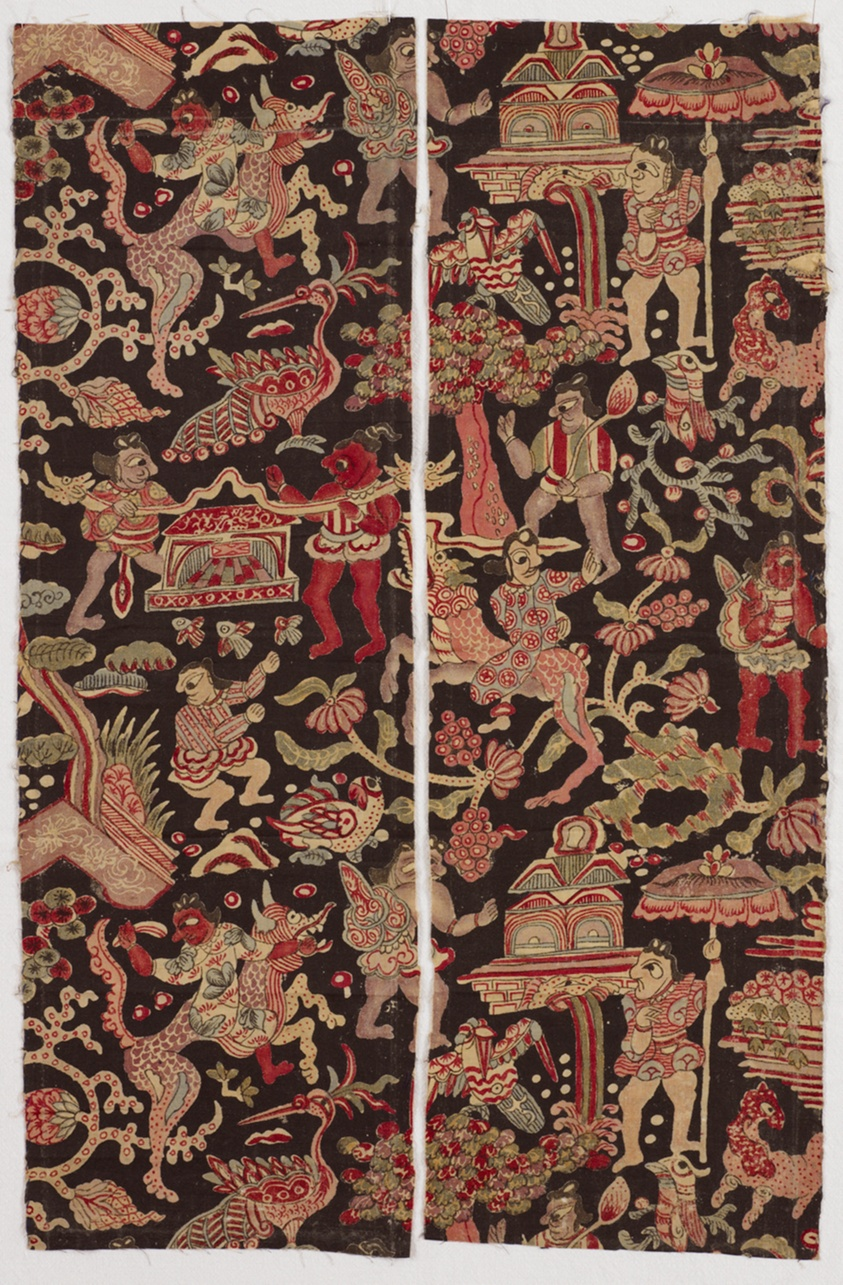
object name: Textile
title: Two Fragments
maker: India, for the Japanese market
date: Edo period (1615–1868), 1675/1727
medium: Two fragments: cotton, plain weave; stenciled and hand-painted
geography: India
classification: textile; weaving - printed